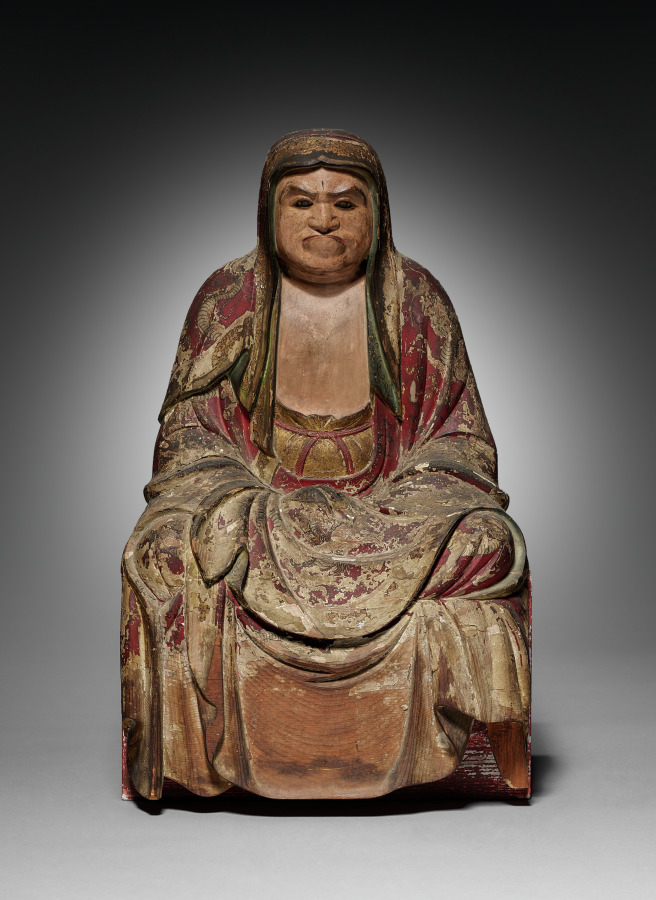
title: Rakan (Arhat) ?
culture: Japan, Edo period (1615–1868)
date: early to mid-1800s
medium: wood, gesso, pigment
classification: Wood